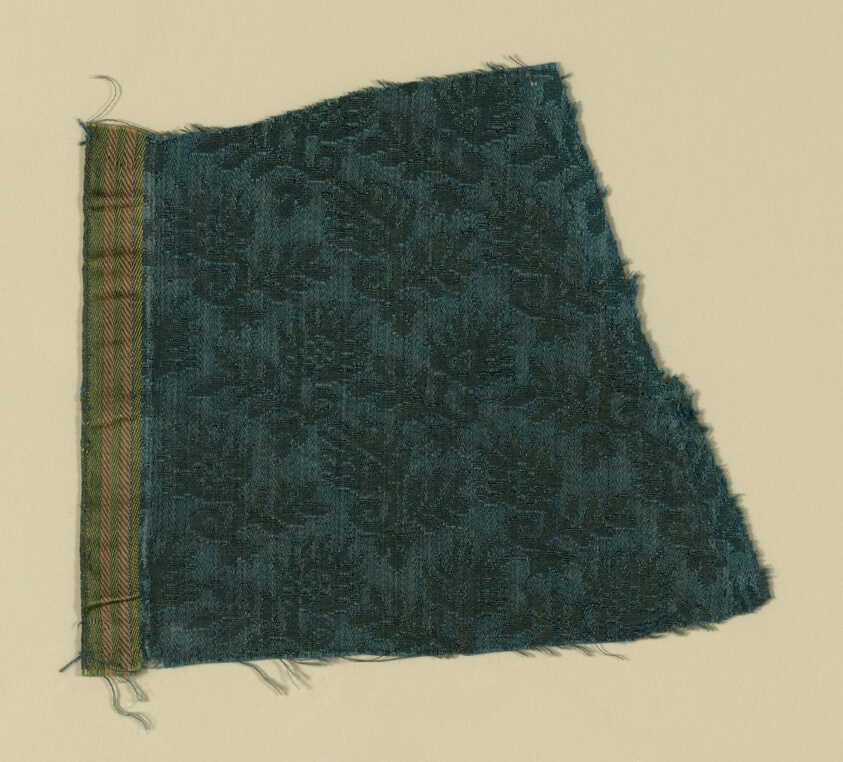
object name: Textile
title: Fragment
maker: Italy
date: 1601/50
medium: Silk, warp-float faced satin weave self-patterned by reversing of faces (satin damask)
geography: Italy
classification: textile; weaving